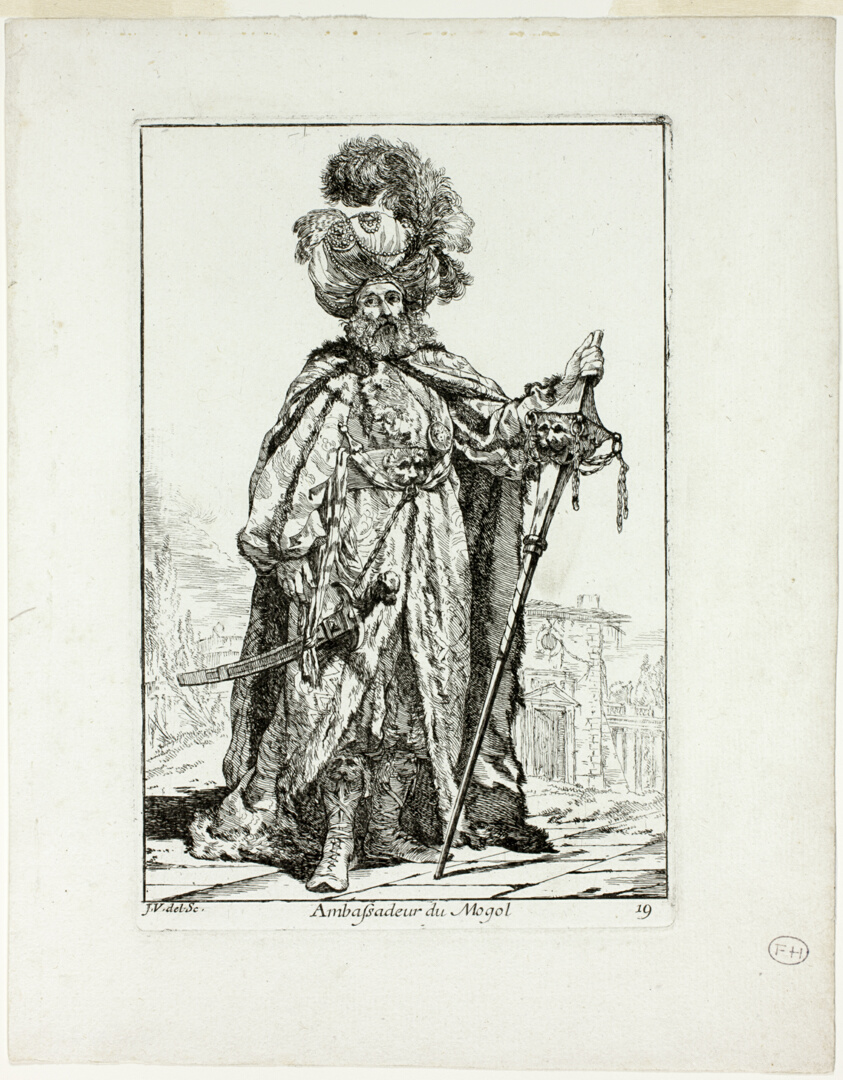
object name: Print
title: Ambassadeur du Mogol, plate nineteen from Caravanne du Sultan à la Mecque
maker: Joseph-Marie Vien, the elder; French, 1716–1809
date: 1748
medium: Etching on ivory laid paper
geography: France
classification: etching; paper; print; prints and drawing